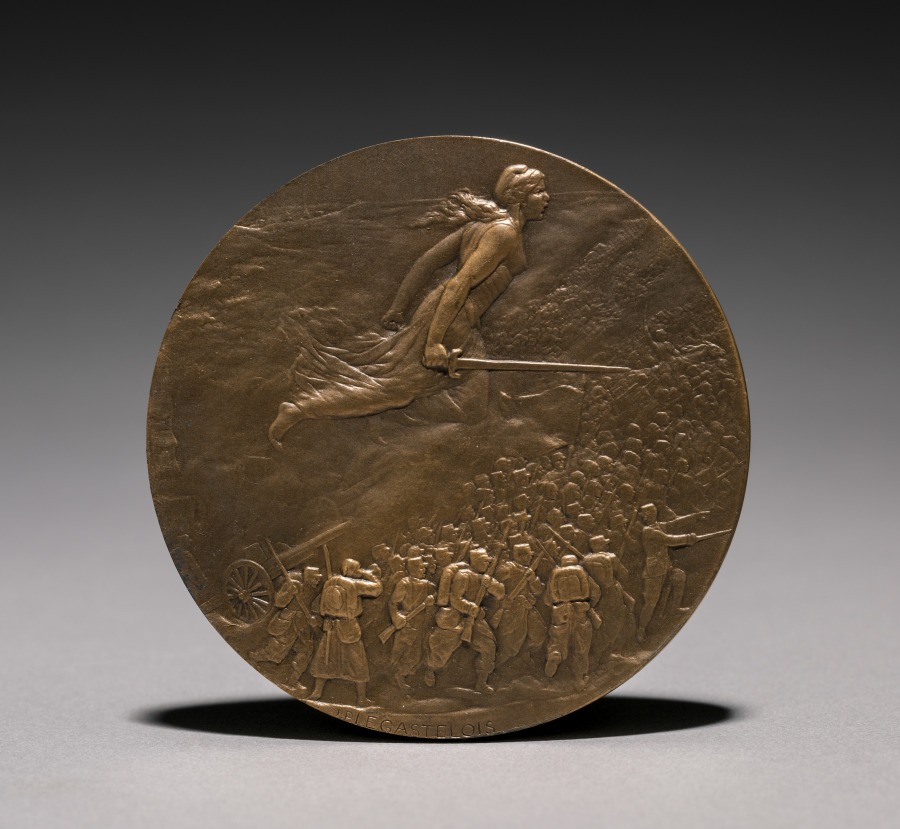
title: Medal (reverse)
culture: France, 20th century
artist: Jules Prosper Legastelois (French, 1855–1931)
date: 1914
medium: bronze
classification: Metalwork